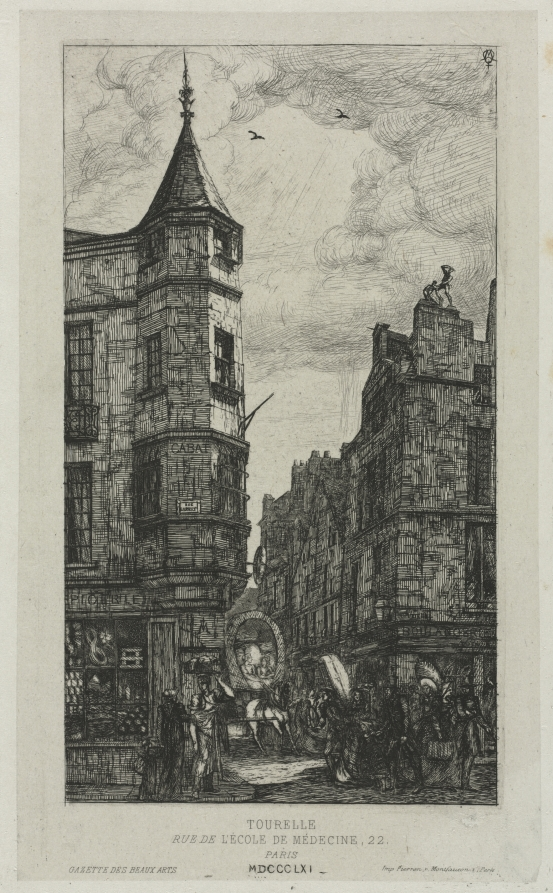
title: House with a Turret, No. 22, rue de L'Ecole de Médecine, Paris, (called the Turret of Marat)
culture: France, 19th century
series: Gazette des Beaux-Arts XIV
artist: Charles Meryon (French, 1821–1868)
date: 1861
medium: etching and drypoint on chine collé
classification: Print